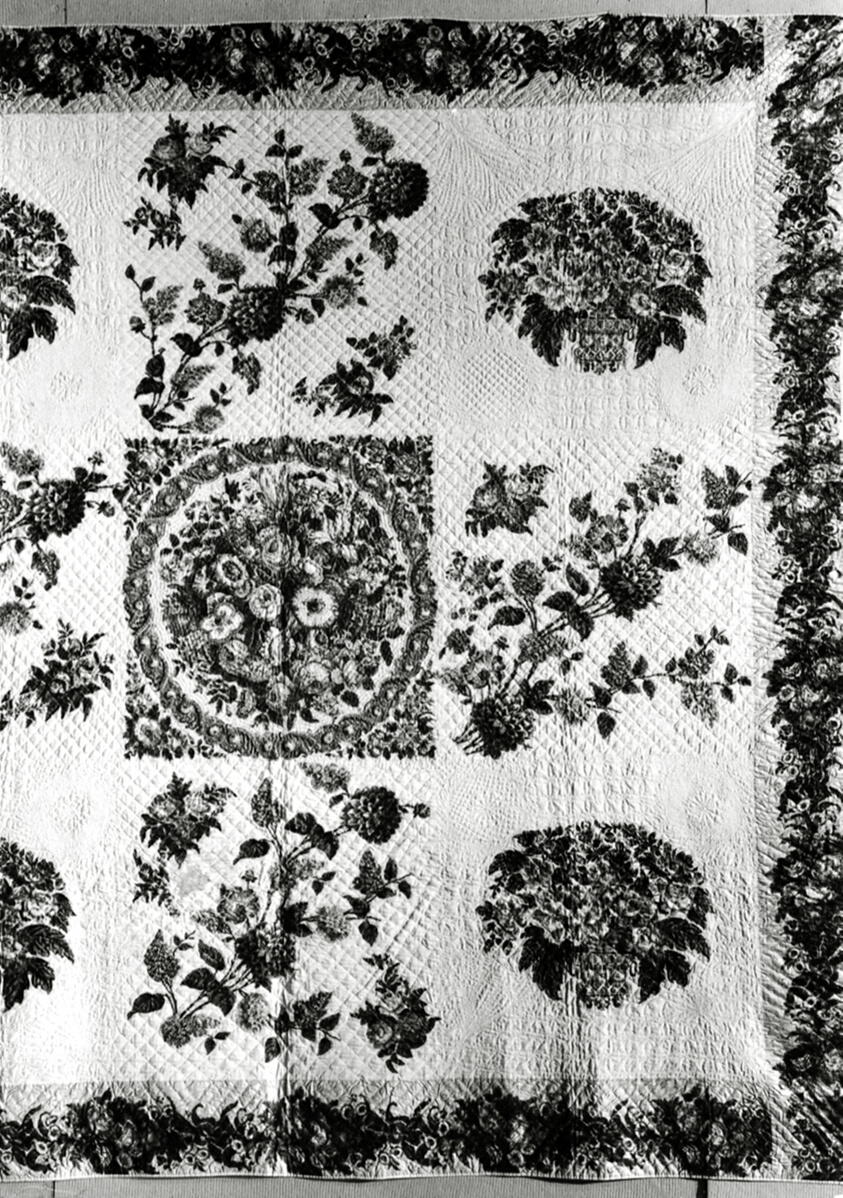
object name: Textile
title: Bedcover (Floral Medallion Quilt)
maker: United States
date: 1830/35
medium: Cotton, pieced plain weaves; one roller printed and glazed; appliquéd with plain weave; printed; glazed; quilted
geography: United States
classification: textile; needlework - quilt